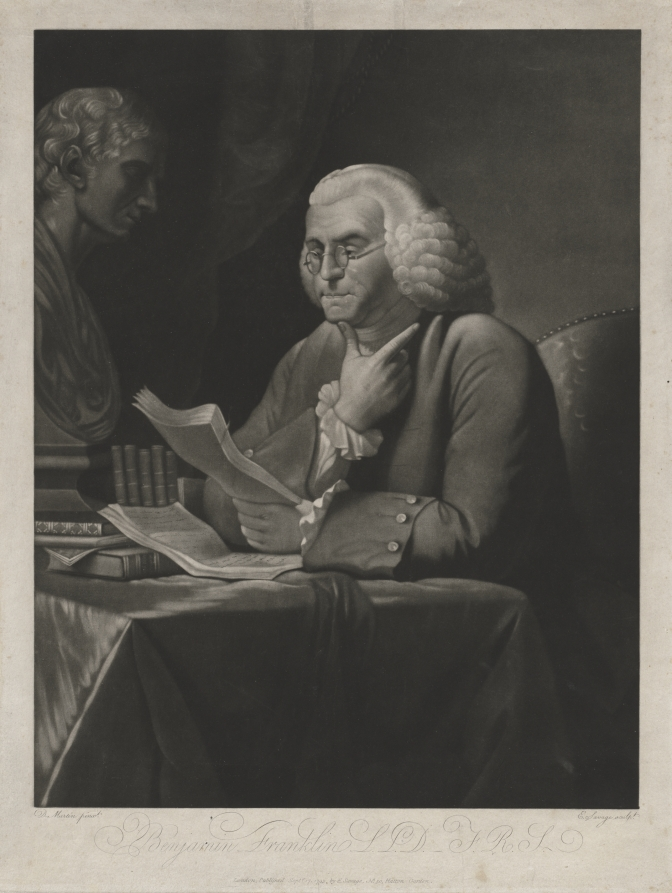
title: Benjamine Franklin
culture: America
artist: Edward Savage (American, 1761–1817)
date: 1793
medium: mezzotint with line engraving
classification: Print